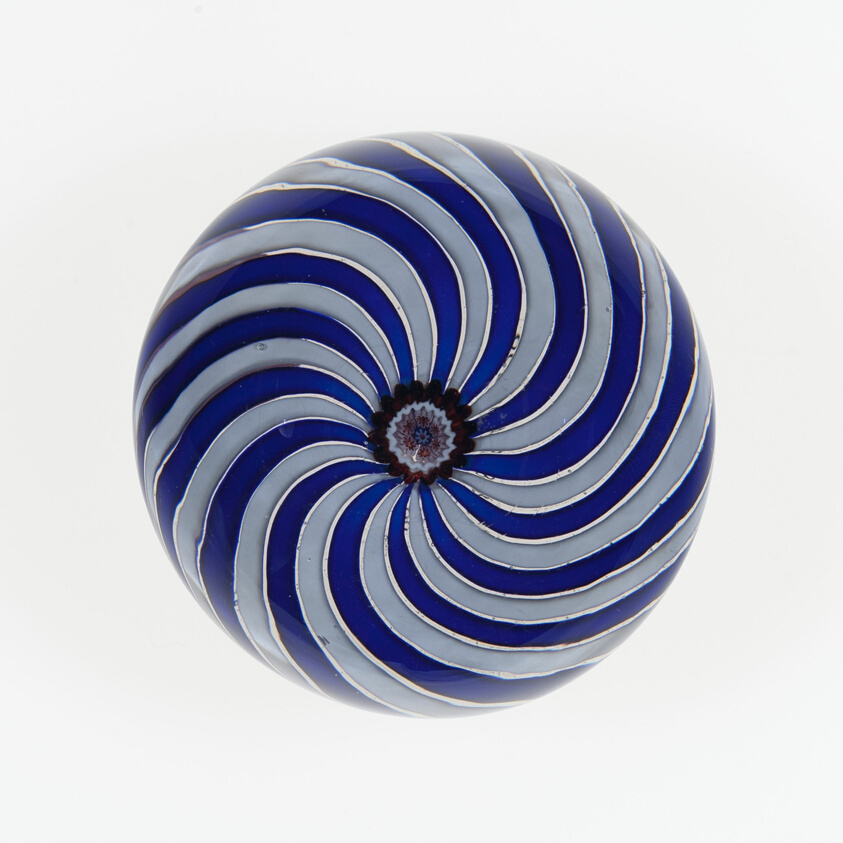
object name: Glass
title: Paperweight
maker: Clichy Glassworks (Cristalleries de Clichy); Clichy, France, 1837-1885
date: c. 1845–60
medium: Glass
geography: Clichy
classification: paperweight; glass